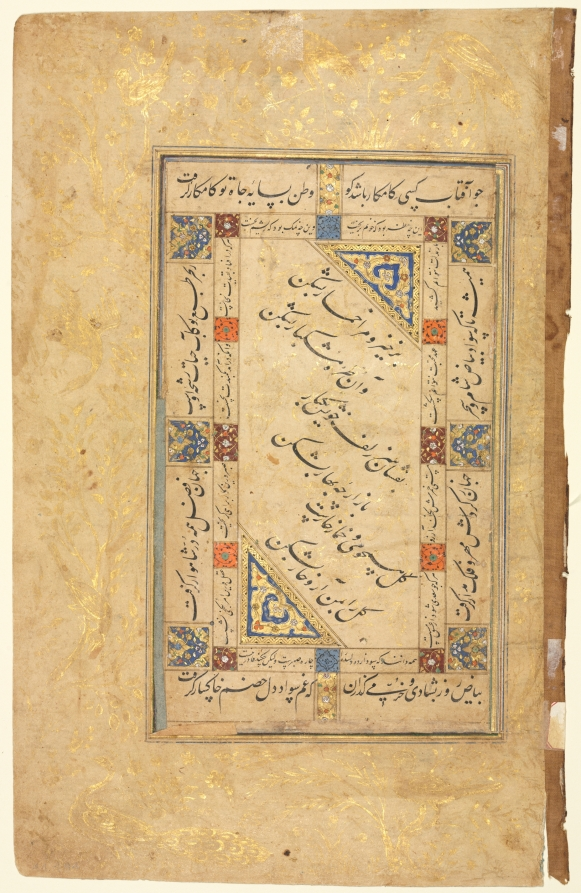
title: Persian Couplets (recto), Calligraphy, Persian Verses; Single Page Manuscript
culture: Iran, Isfahan, Safavid period (1501-1722)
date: late 1500s–early 1600s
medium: ink, gold, and opaque watercolor on paper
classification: Manuscript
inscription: script: Nasta'liq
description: Under Shah Abbas, the tradition in which painting was employed to illustrate a literary work was all but abandoned. In its place came a new concern with single-page illustrations, such as this one, which have no specific content or meaning. They often illustrate albums of collections of verses about love and beauty, in which these themes often appear to serve as allegories of things divine.